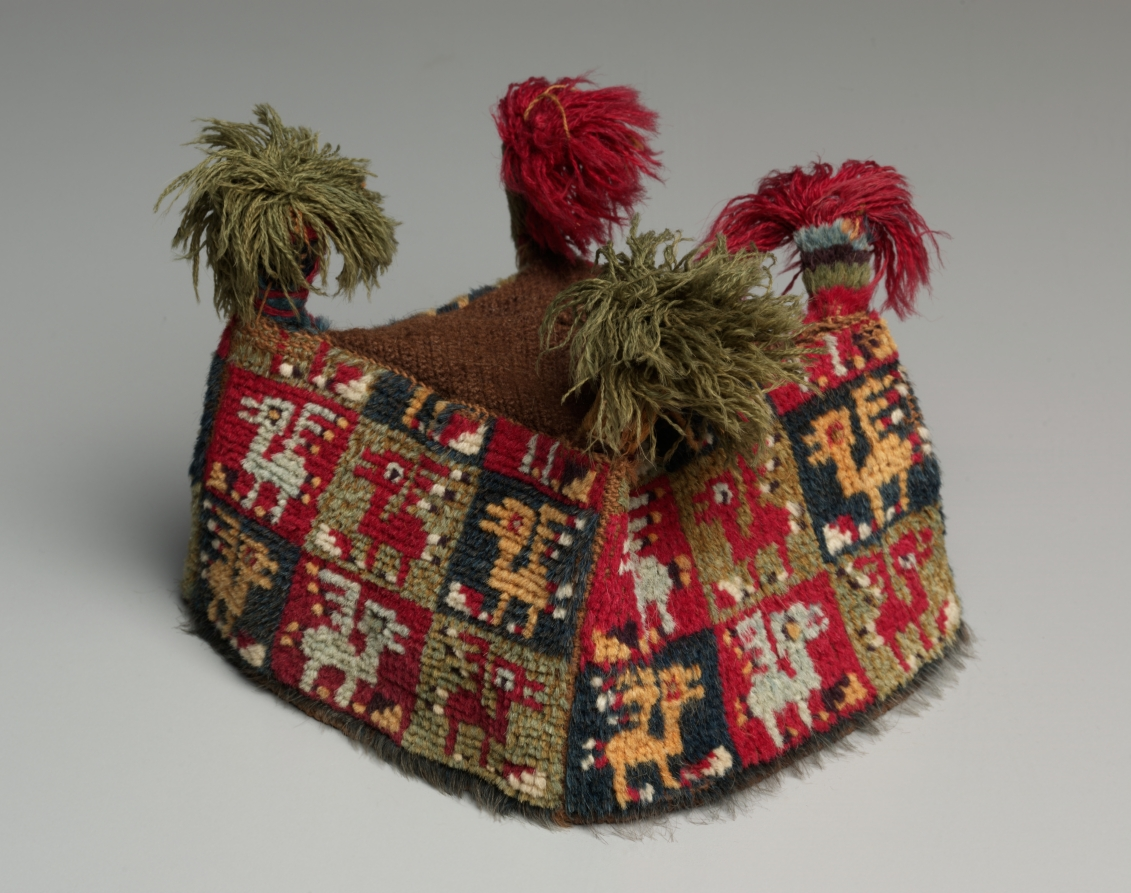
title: Four-Cornered Hat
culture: Peru, South Coast, Wari Culture, Middle Horizon, 8th-11th Century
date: c. 700–1100 A.D.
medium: needle network with cut pile: cotton and wool; reseau for top: cotton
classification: Textile